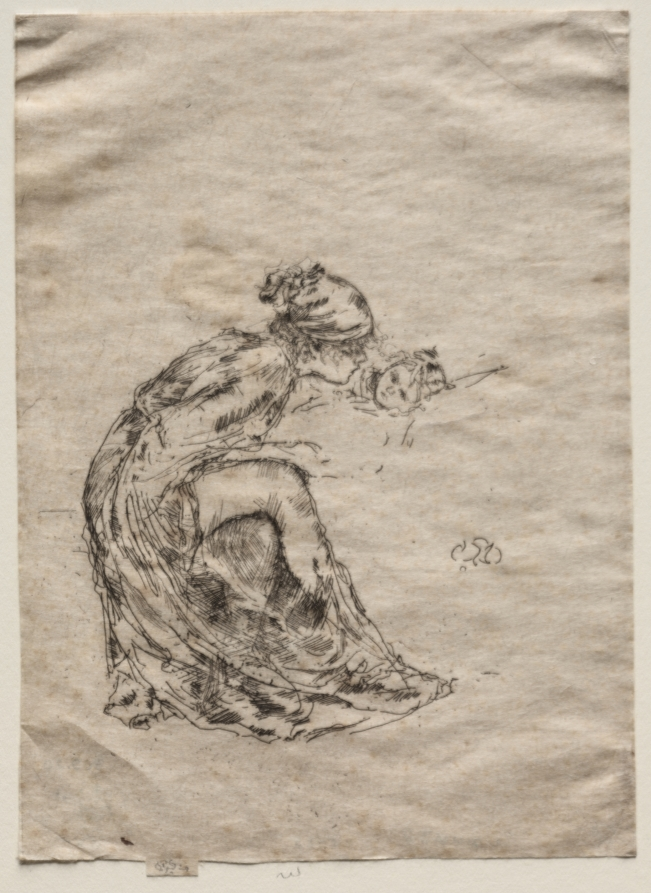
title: Cameo, No. 1 (Mother and Child)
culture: America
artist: James McNeill Whistler (American, 1834–1903)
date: 1891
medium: etching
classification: Print